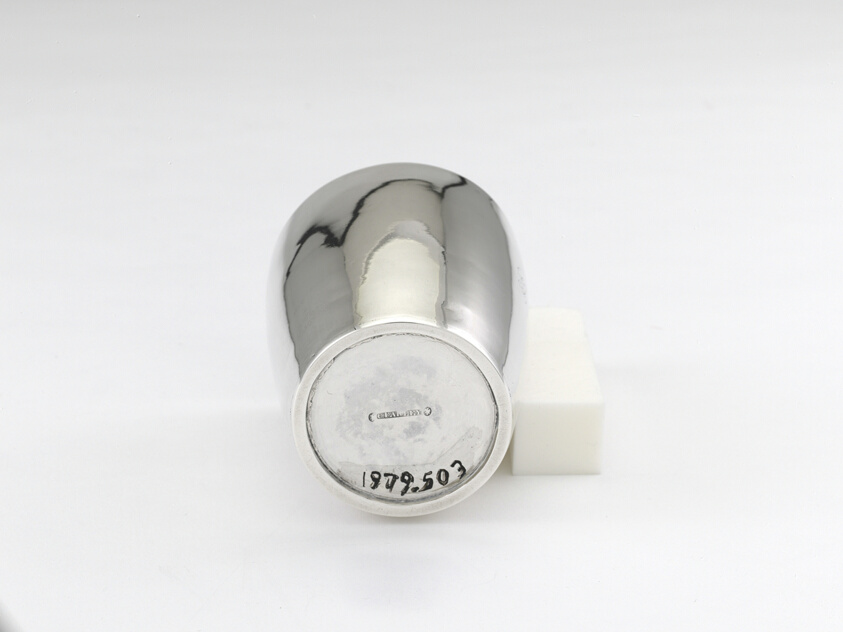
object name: Metalwork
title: Beaker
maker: Charles Farley (American, 1791–1877); Portland, Maine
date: 1812–30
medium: Silver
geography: Portland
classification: drinking vessel; silver; american decorative arts; american arts; decorative arts